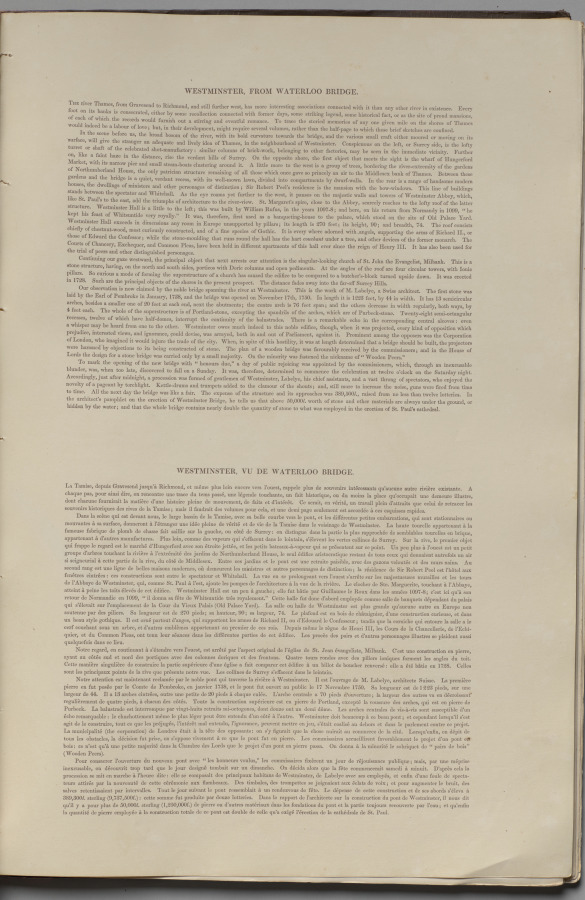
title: London As It Is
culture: England, 19th century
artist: Thomas Shotter Boys (British, 1803–1874)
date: 1842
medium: lithograph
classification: Bound Volume